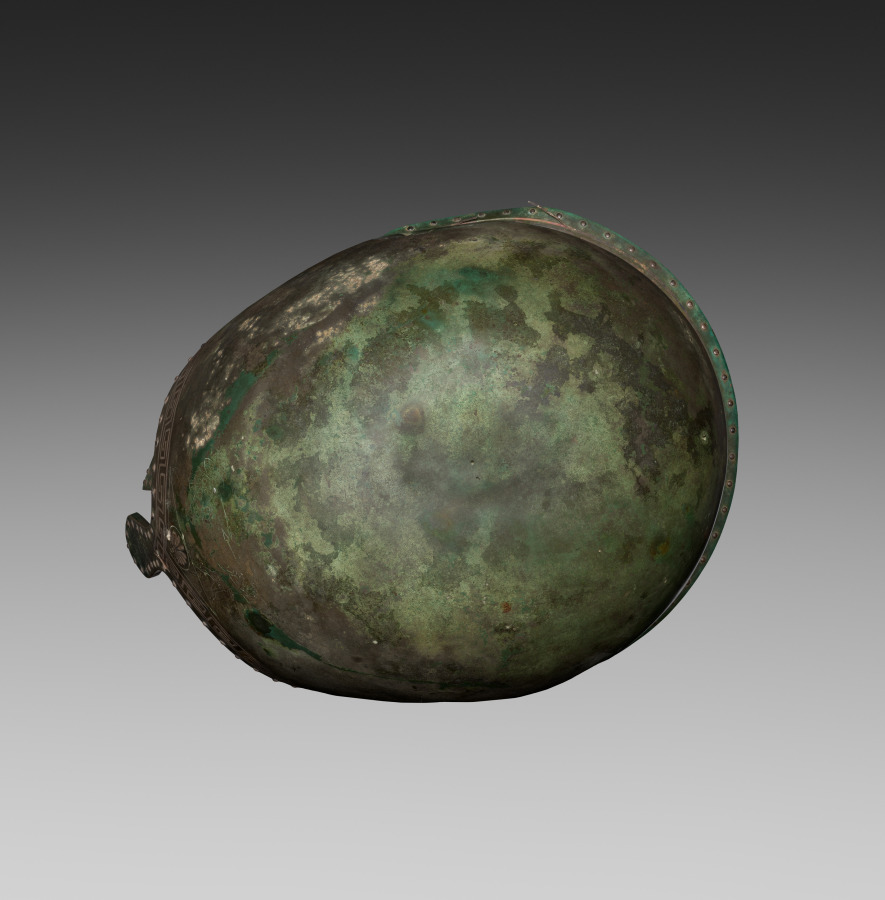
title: Corinthian Helmet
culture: Greece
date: 500–475 BCE or modern (before 1926)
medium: bronze with silver inlay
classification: Arms and Armor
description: Probably cast and then hammered into shape, this bronze helmet belongs to a type known as Corinthian, with almond-shaped eye holes, large cheekpieces, and a wide nose guard. Its significant weight raised early suspicions about authenticity, and although a 1928 technical examination found no conclusive evidence of forgery, scholars have continued to doubt its antiquity. Unusual details include the intact rivets, or metal fasteners, meant to secure liners; usually only their holes survive. The dueling warriors and inlaid palmette above the brow also find few parallels, and the silver meander pattern is unique. Most recently, a 2024 analysis found that both the copper and silver alloys of the helmet differ significantly from those expected in an ancient Greek helmet.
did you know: This helmet is very heavy—2.56 kilograms (5 lbs., 10 oz.), compared to average ancient helmets of 1.2–1.6 kilograms (about 3 lbs.).